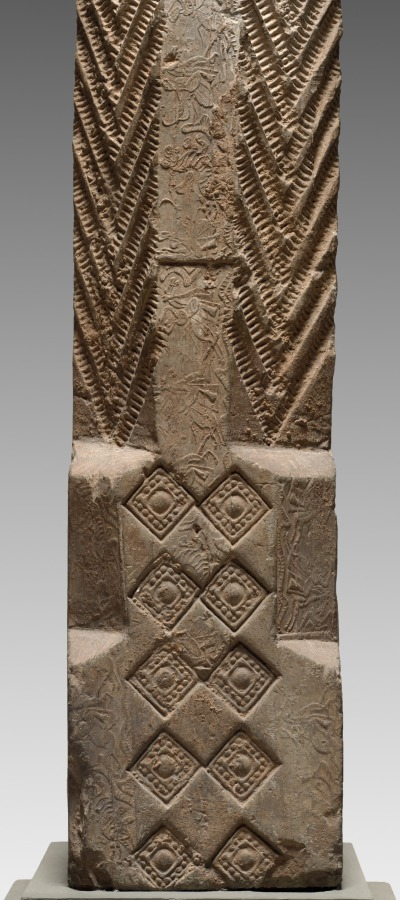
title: Hollow Tile: Column from Tomb-Chamber Doorway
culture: China, Han dynasty (202 BCE–220 CE)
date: 100–200 CE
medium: earthenware, die-stamped relief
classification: Ceramic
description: Striding tigers (top), racing horsemen (right column), and reverent officials (left column) are stamped into the surface of this underground portal to a tomb. The doorway preserves in stone the post-and-lintel structure, a basic element of Chinese wooden architecture. By the first century CE, a revolution in Chinese tomb construction and furnishing had taken place. Tombs lined with decorated bricks and tiles replace the earlier tombs constructed with only rammed-earth walls. Ceramic surrogates or models of stoves, houses, servants, and pets filled these more durable chambers, symbolically extending the creature comforts of this world into the world after death.